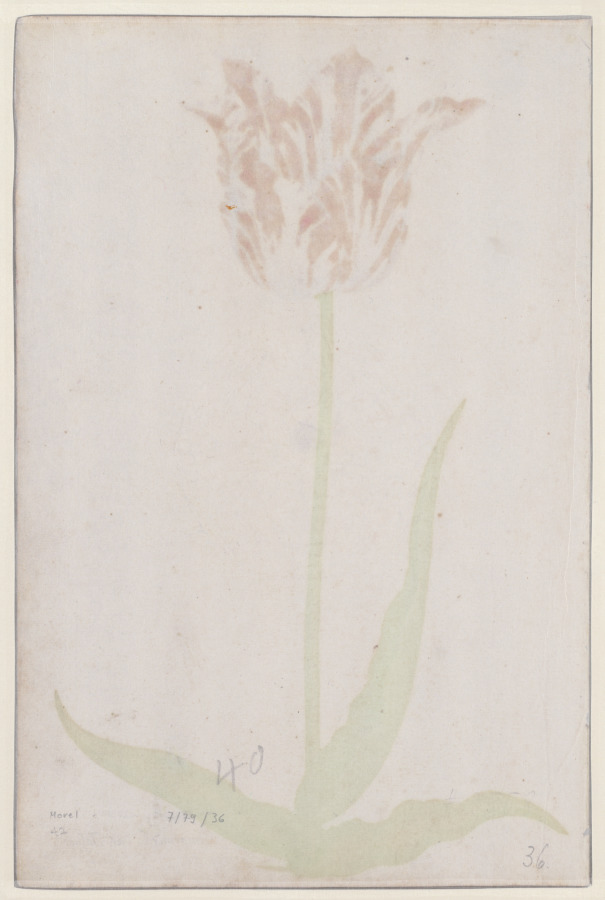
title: Study of a Tulip (Gemarmerde van Jasper)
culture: Netherlands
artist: Pieter Holsteyn II (Dutch, c.1612–1673)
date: c. 1645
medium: brush and watercolor in crimson, gray, and green over traces of charcoal on antique laid paper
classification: Drawing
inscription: recto, Gemarmerde van Jasper. in black ink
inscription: brown ink inscription in different hand cut off, lower border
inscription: verso, Morel and 7/79/36 and 40 and 42 and 36 in graphite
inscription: watermark: pelican within wreath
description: This image of a tulip was made as part of a tulip book used as a grower’s marketing tool during the so-called tulip mania, a speculative bubble in 17th-century Holland, when ten tulip bulbs could cost more than a stately Amsterdam canal house. The striations on the tulip, which were caused by a virus in the bulb, made it especially valuable. Pieter Holsteyn II was one of many artists in the Netherlands at the time who specialized in botanical illustration. This tulip's Dutch name, inscribed on the sheet, translates roughly to "marriage of jasper stone."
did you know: In 17th-century Holland, some tulip bulbs were as expensive as a stately Amsterdam canal house!